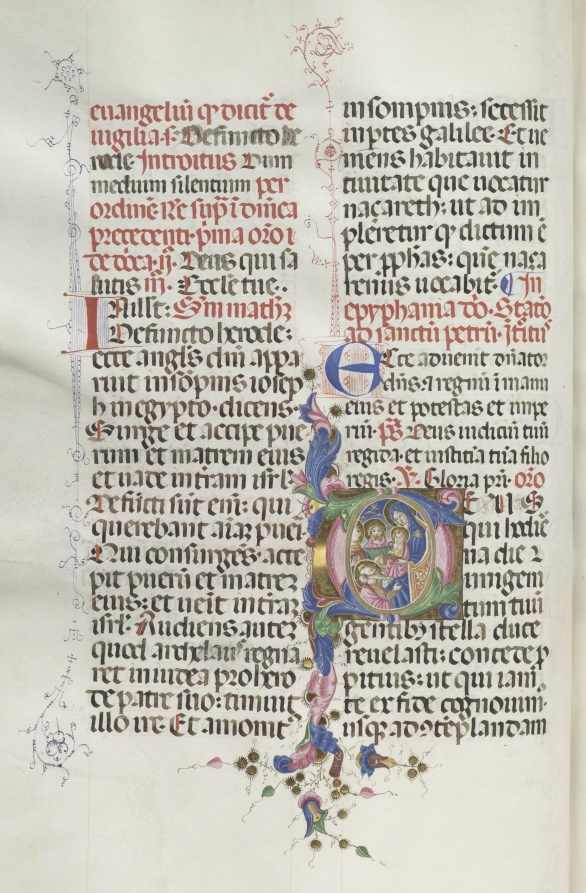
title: Missale: Fol. 30v: Adoration of the Magi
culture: Italy, Perugia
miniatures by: Bartolommeo Caporali (Italian, c. 1420–1503)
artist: assisted by Giapeco Caporali (Italian, d. 1478)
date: 1469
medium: ink, tempera and burnished gold on vellum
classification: Bound Volume